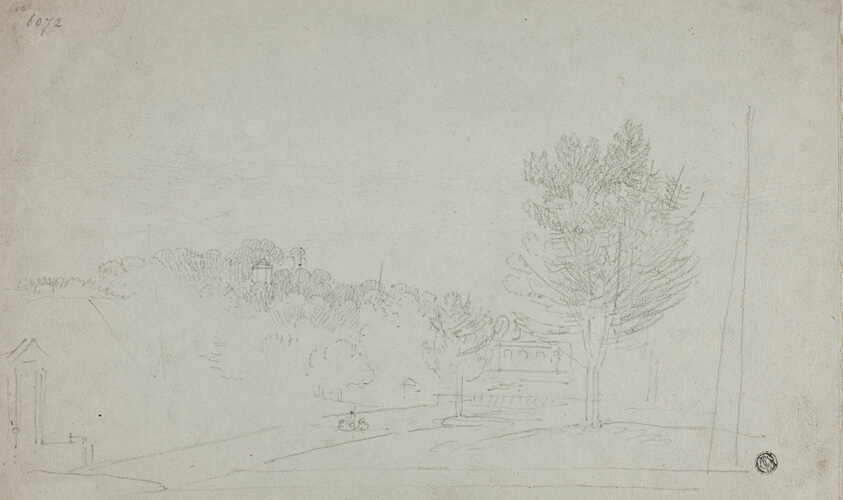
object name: Drawing and Watercolor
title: View of Wilson House and Gardens (recto); View of Wilson House and Gardens (verso)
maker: Richard Wilson (English, 1714-1782)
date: 1760/69 (recto); n.d. (verso)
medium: Black chalk (recto and verso) on gray laid paper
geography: England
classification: chalk; drawings (visual works); prints and drawing